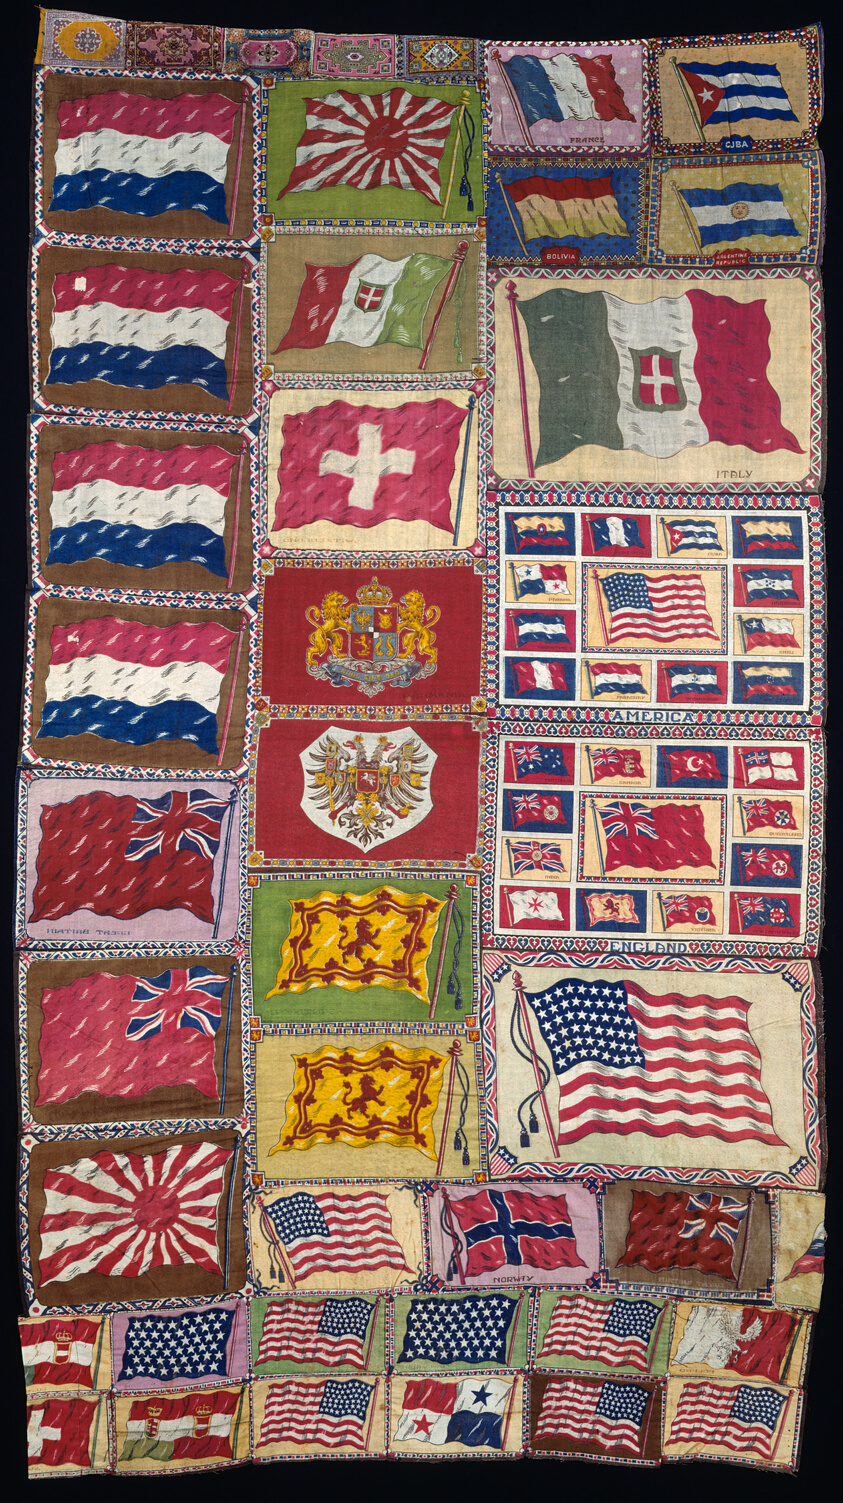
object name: Textile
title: Bedcover (Incomplete Cigar or Tobacco Rectangles ("Top Sheets") Quilt)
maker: United States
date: 1900/10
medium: Forty-two rectangles of cotton, plain weave; roller printed, fulled; joined by machine stitching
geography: United States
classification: textile; needlework - quilt